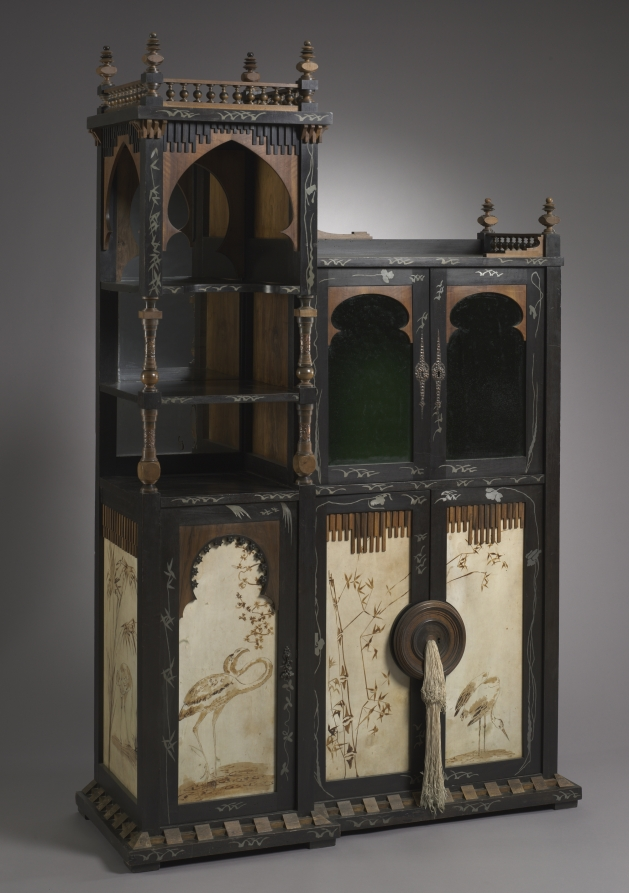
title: Cabinet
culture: France, late 19th Century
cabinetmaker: Carlo Bugatti (Italian, 1856–1940)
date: c. 1895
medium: wood with metal inlays and painted parchment, glass doors and mirror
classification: Furniture and woodwork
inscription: vellum panel on right side at the bottom signed in pseudo Japanese letters: "Casati. (No professional artist of this name has been discovered; may be the work of the society woman, the Marchese Casati.)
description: In both form and decoration this cabinet typifies the work of Carlo Bugatti. Asymmetrical, with a tower-like element at one side, there are Islamic-inspired ornaments throughout its design, notably the onion-shaped arches in the upper half of the cabinet. Japanese influence is also evident in the white metal inlays and in the sepia-painted parchment panels. The cabinet displays an extensive vocabulary of other decorative devices, including the partial ebonized frame, the turned wooden ornaments, metal reliefs, mirrored and green glass, and silk tassels. Despite their diversity, Bugatti organized all these elements into a coherent design.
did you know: Carlo Bugatti's sons achieved illustrious careers of their own. Rembrandt Bugatti (1884-1916) became a celebrated sculptor, and Ettore Bugatti (1881-1947) manufactured luxurious automobiles and racing cars.